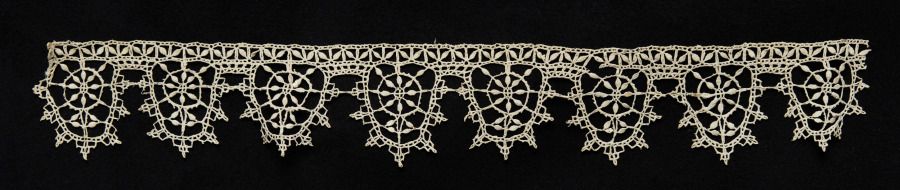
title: Lace Edging of Points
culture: Italy, Genoa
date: 1550–99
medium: Bobbin lace (needle lace, reticella design)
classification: Lace